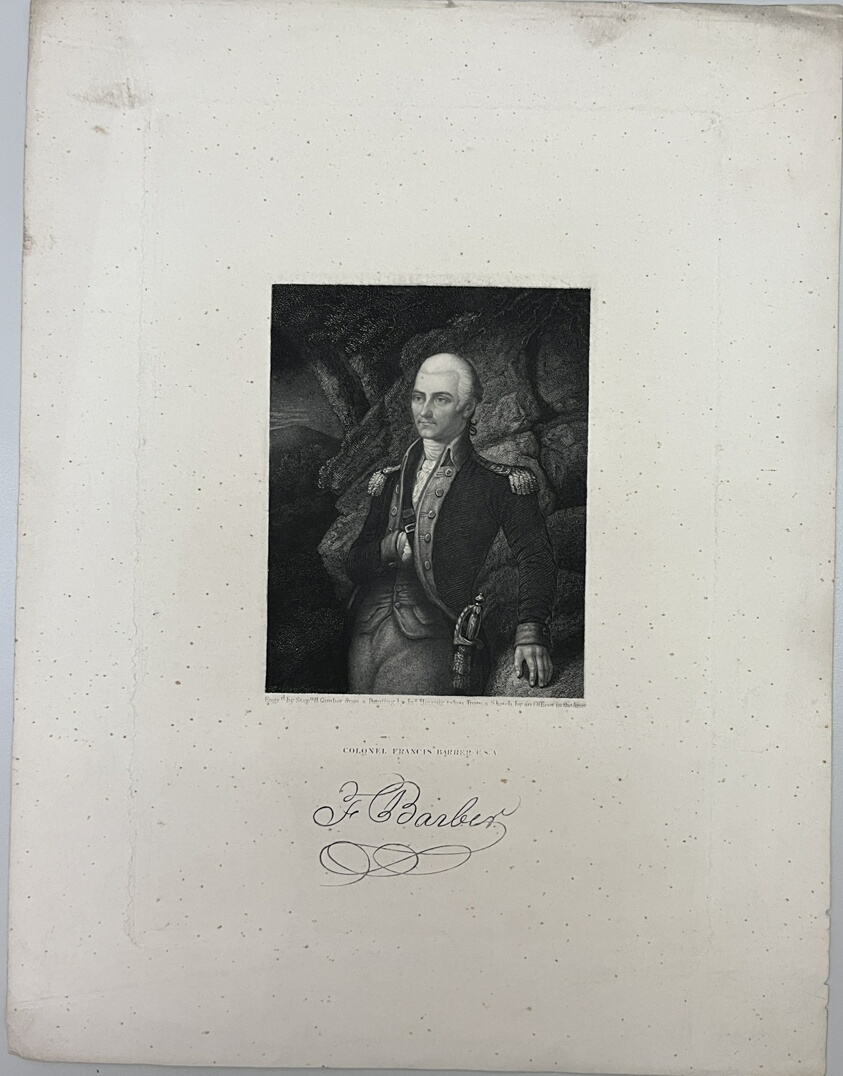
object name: Print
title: Colonel Francis Barber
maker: Stephen Henry Gimber (American, c. 1806-1862); after James Herring (American, 1794-1867); after Artist Unknown (American, 19th century)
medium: Stipple engraving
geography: United States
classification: reproduction; print; prints and drawing